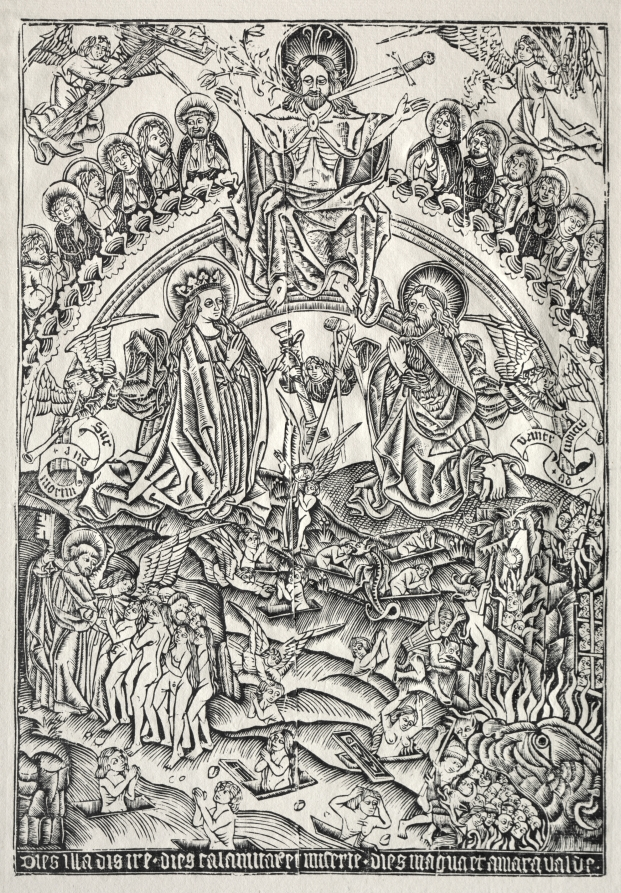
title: Das Jüngste Gericht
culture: Germany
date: c. 1490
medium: woodcut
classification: Print